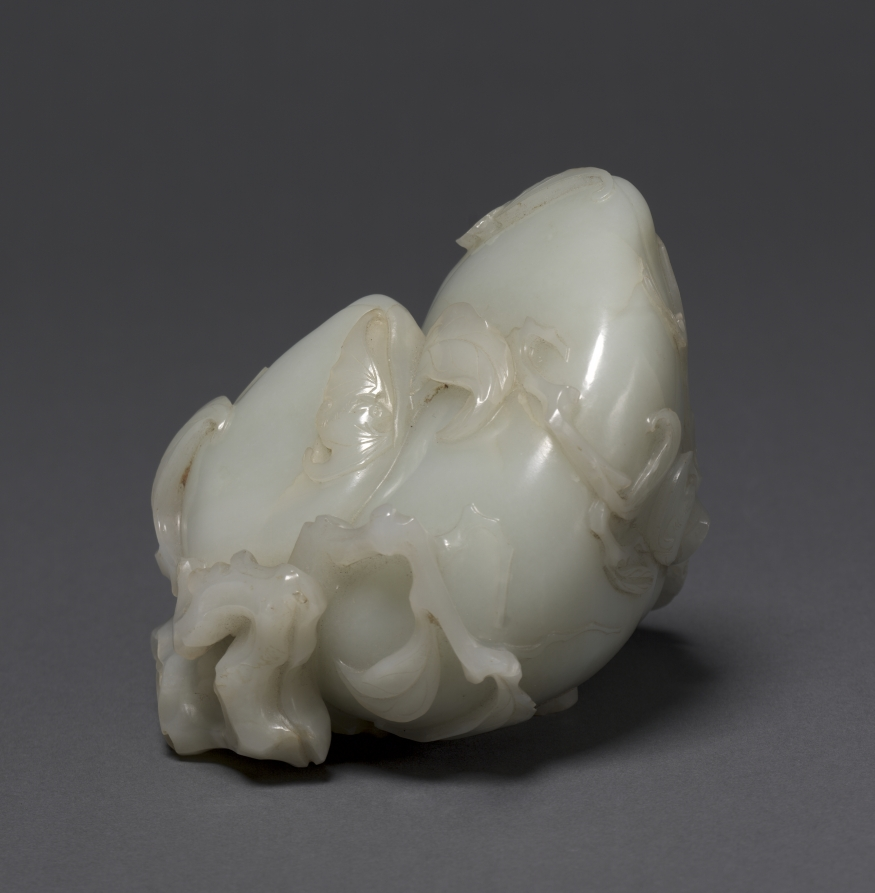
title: Peaches and Bats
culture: China, Qing dynasty (1644–1911)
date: late 1600s–1700s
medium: greenish-white jade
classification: Jade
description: This white jade is carved as a double peach with realistically detailed leaves and branch following the curve of the jade. Clinging to the edge are a pair of bats, which represent good fortune.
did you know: This jade sculpture was given to the museum in memory of John D. Rockefeller and his family.